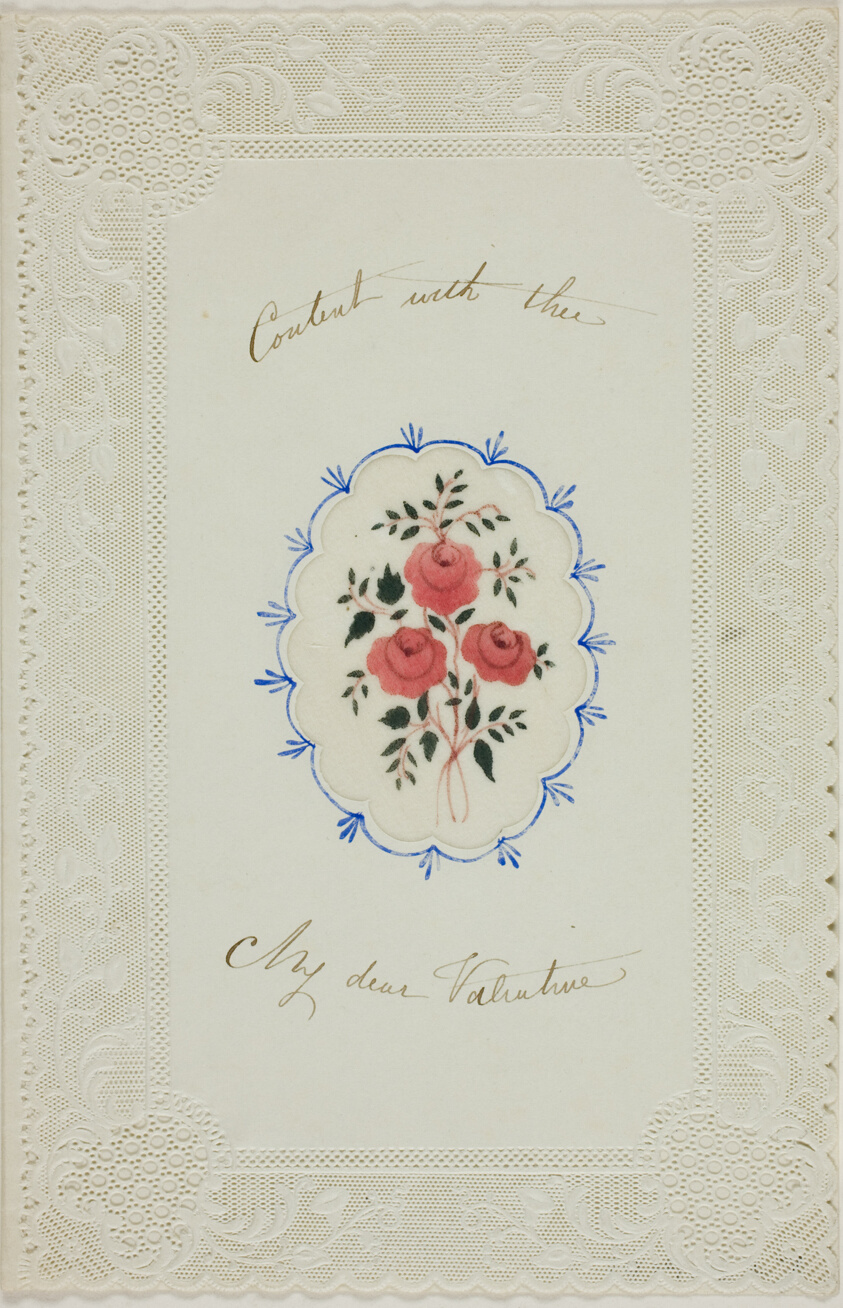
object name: Drawing and Watercolor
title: Content with Thee My Dear Valentine (valentine)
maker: Unknown Artist; English, 19th century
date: c. 1850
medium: Watercolor and pen and black ink, with collaged element on cut an embossed ivory wove paper (lace)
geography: England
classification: valentine; prints and drawing; paper